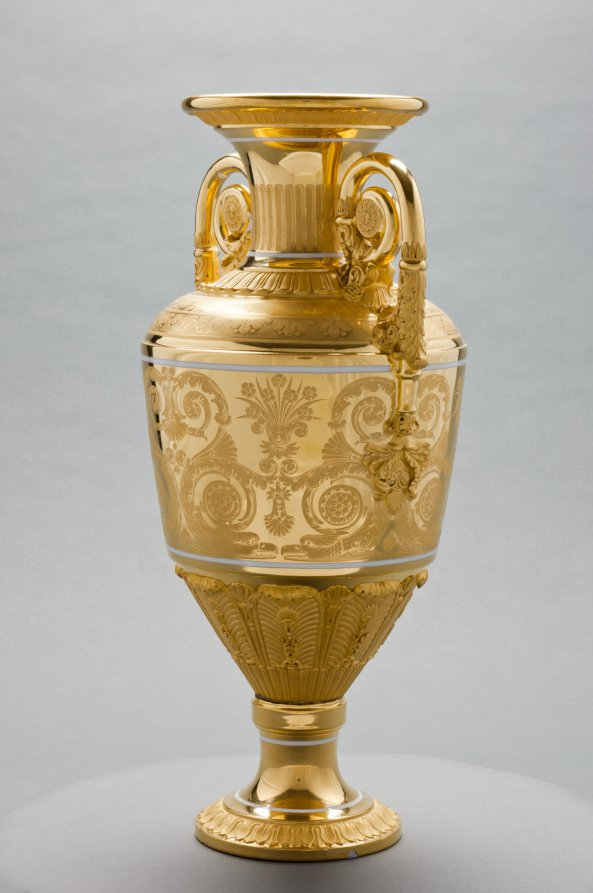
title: Vase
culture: Russia, St. Petersburg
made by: St. Petersburg Imperial Porcelain Factory (Russian)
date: c. 1820–1830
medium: gilt porcelain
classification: Ceramic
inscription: inscribed: "Moreau" in gold near lip.